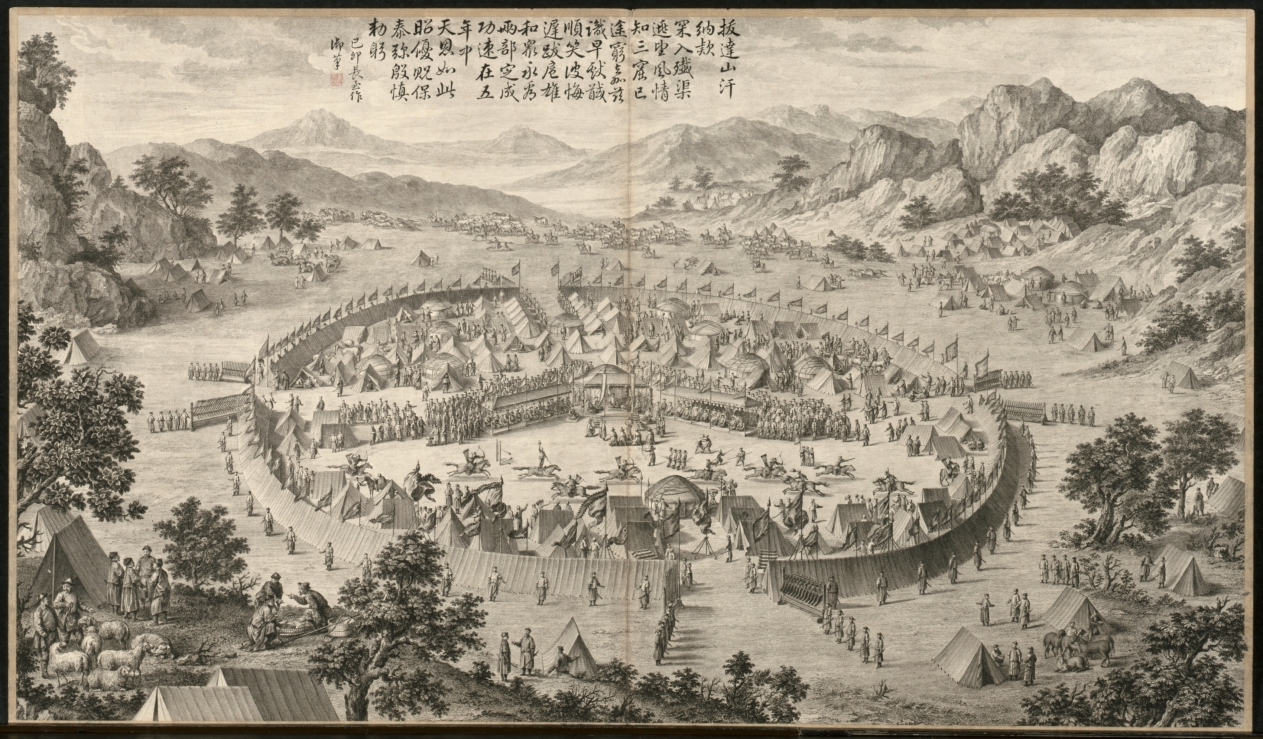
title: Khan of Bada Shan Presenting Tribute: from Battle Scenes of the Quelling of Rebellions in the Western Regions, with Imperial Poems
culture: China, Qing dynasty (1644–1911), Qianlong reign (1736–95)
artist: Jean Damascene Sallusti (Italian, d. 1781)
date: c. 1765–74; poem dated 1759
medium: etching, mounted in album form, 16 leaves plus two additional leaves of inscriptions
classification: Print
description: This set of etchings was commissioned by Emperor Qianlong to record in pictorial terms the courage of his generals and soldiers in quelling the rebellions in the Western Regions. Qianlong added his own poem to each of the etchings, indicating his appreciation and pride in this demonstration of military might. "Western Regions" refers to the present-day Xingjiang province, often described in Western writing as "Central Asia."